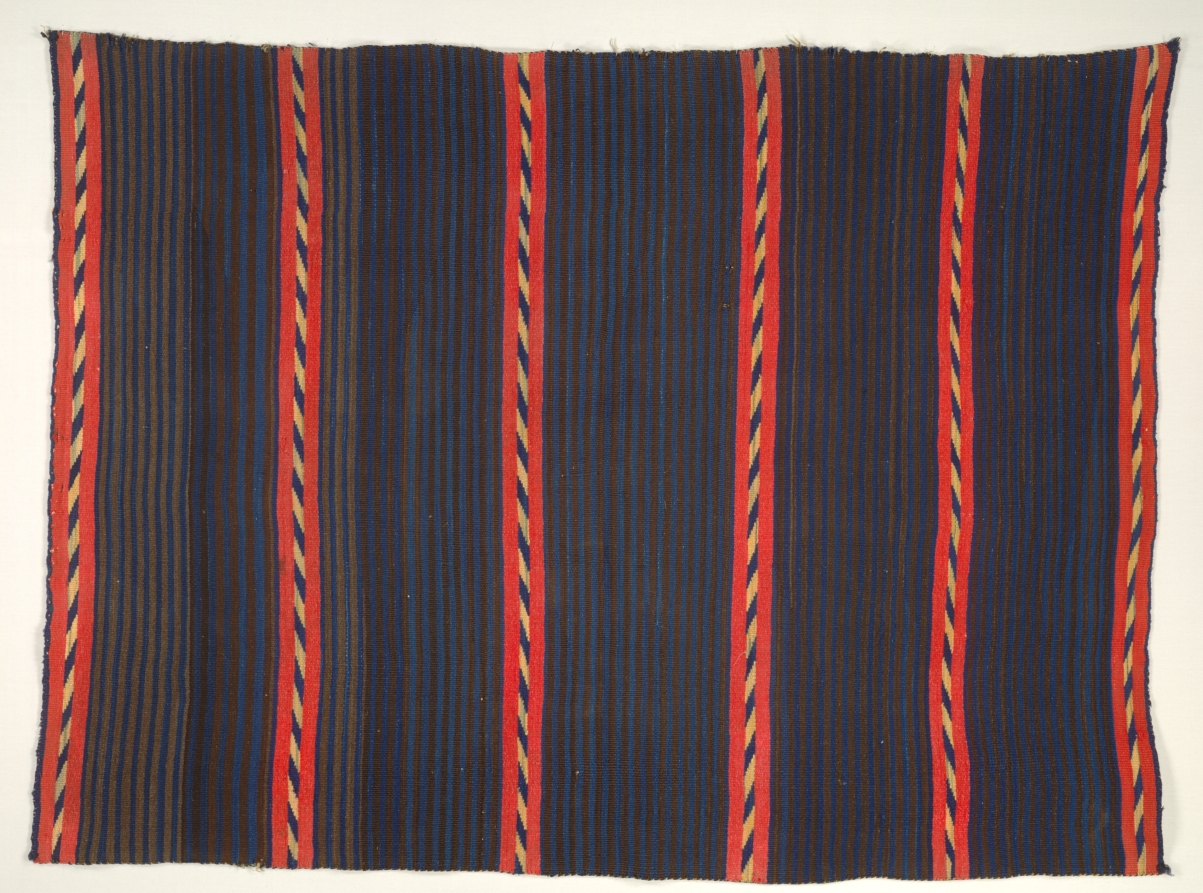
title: Wearing Blanket with Moki (Moqui) Stripes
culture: America, Native North American, Southwest, (Dine) Navajo or Zuni Pueblo, female artist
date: 1865–75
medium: Wool (handspun, Germantown, and bayeta): tapestry weave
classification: Textile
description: Diné (Navajo) blankets reflect the Southwest’s cultural diversity. Both of these examples feature a striped moki pattern. The origin of moki is unclear, but it may have come from Pueblo peoples, from whom the Diné learned weaving after migrating to the Southwest from the sub-Arctic north. Or it could have come from the Spaniards, who arrived in the Southwest in 1540, not long after the Diné. Although its patterns are centuries old, these blankets were created during the late 1800s to early 1900s, when Diné weavers began to shift from making garments for Indigenous use, including trade, to creating items for outside collectors. In this market, traditional wearing-blankets, which were worn around the shoulders, became rugs sold to outsiders.